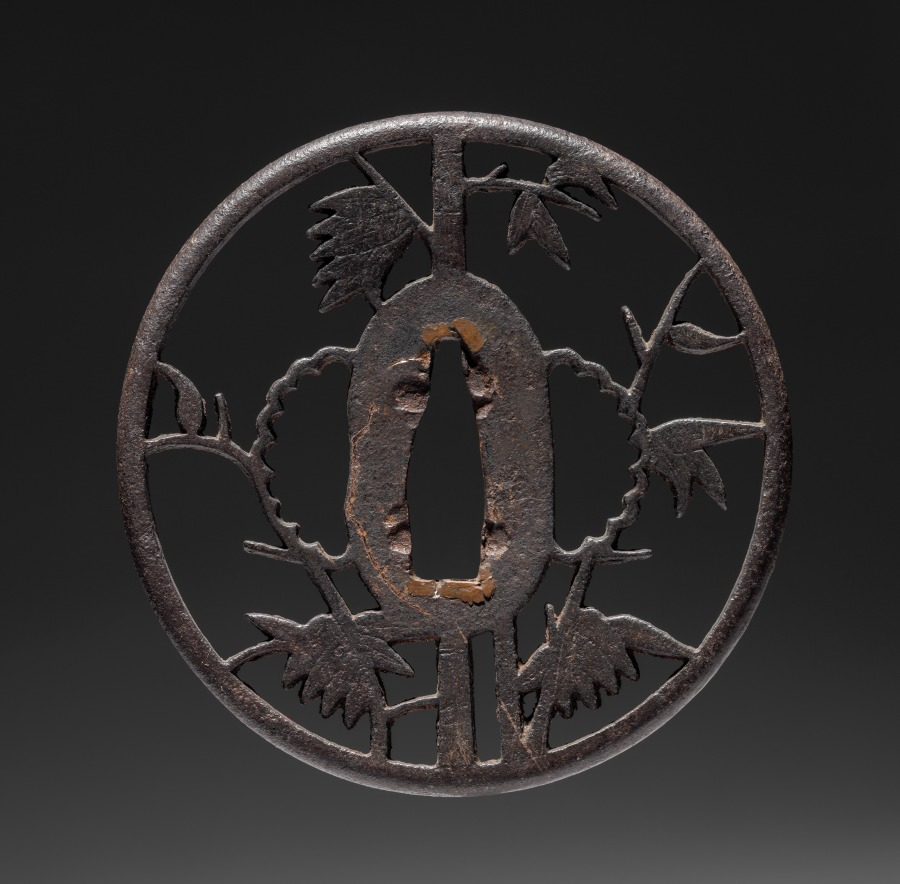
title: Sword Guard (Tsuba) with Bamboo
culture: Japan, Edo period (1615–1868)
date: c. 1615–1868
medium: iron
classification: Arms and Armor